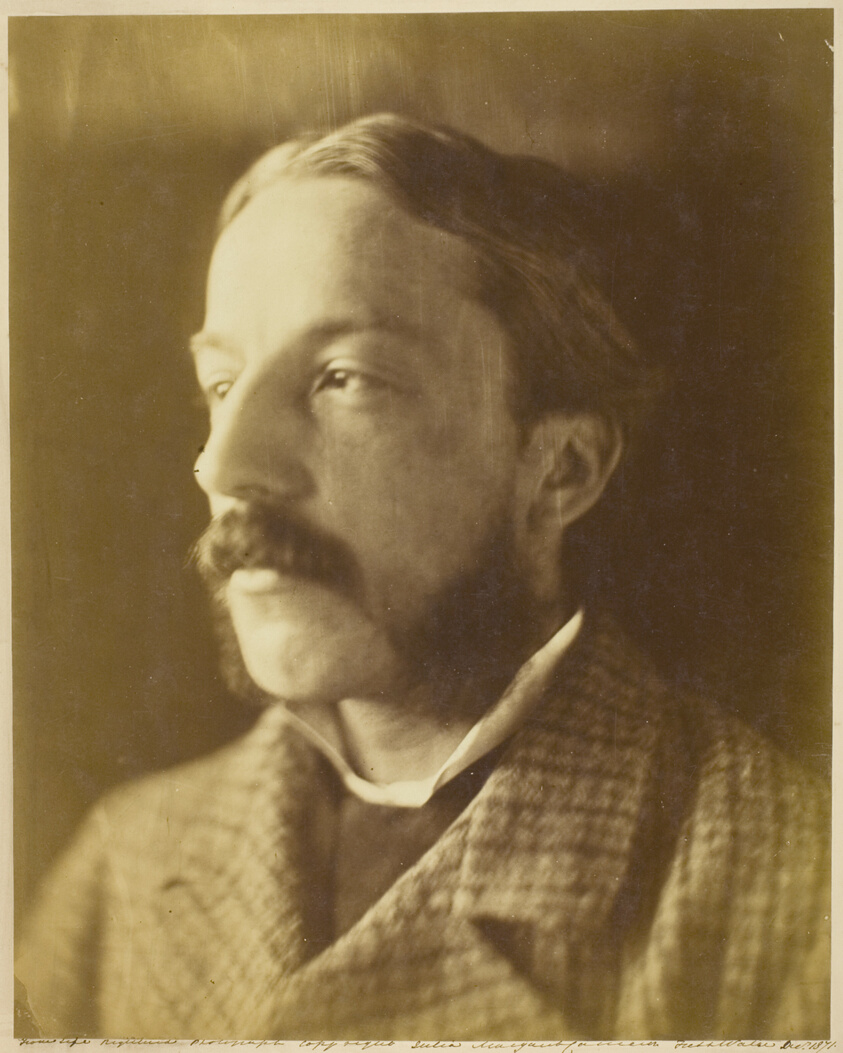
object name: Photograph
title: My Beloved Son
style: 19th century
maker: Julia Margaret Cameron (English, 1815–1879)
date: December 1871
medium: Albumen print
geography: England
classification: albumen silver print; photographic process; photography; photograph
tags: portraits, portraits: male subject, photography